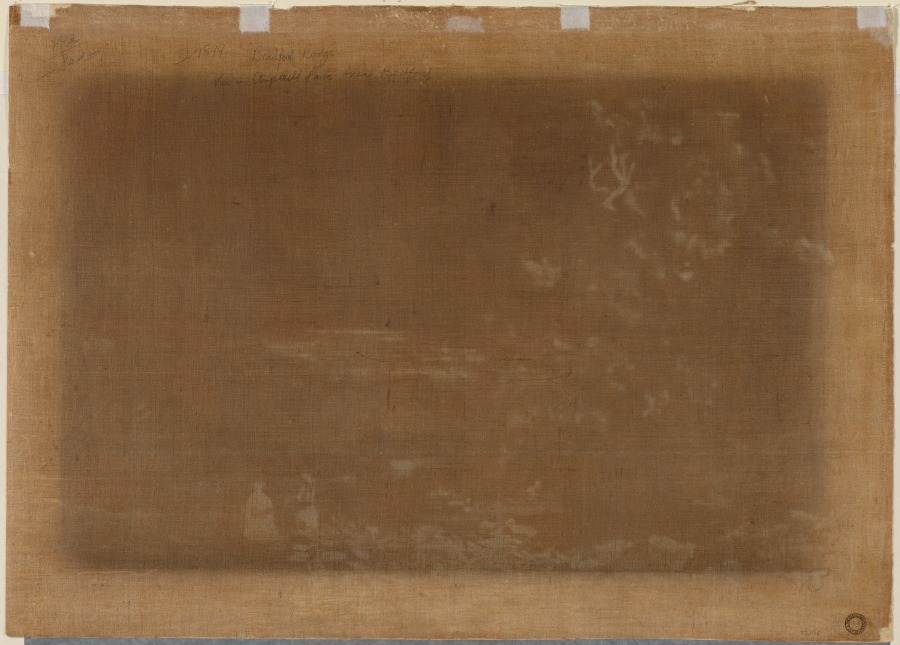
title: View near Bedford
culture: England, 19th century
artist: Bradford Rudge (British, 1805–1885)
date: c. 1825–85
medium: watercolor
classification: Drawing